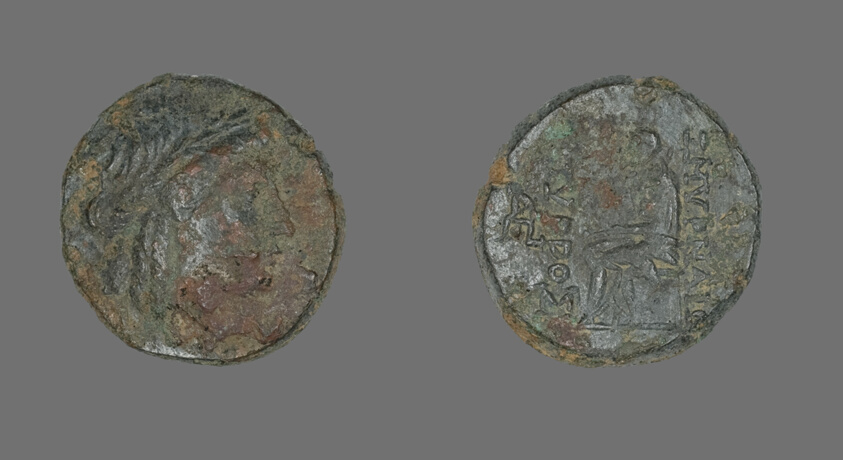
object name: Coin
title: Coin Depicting the God Apollo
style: greek, ancient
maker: Greek; Smyrna, Ionia (now Izmir, Turkey)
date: 2nd-1st century BCE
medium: Bronze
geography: Smyrna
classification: coin; ancient art